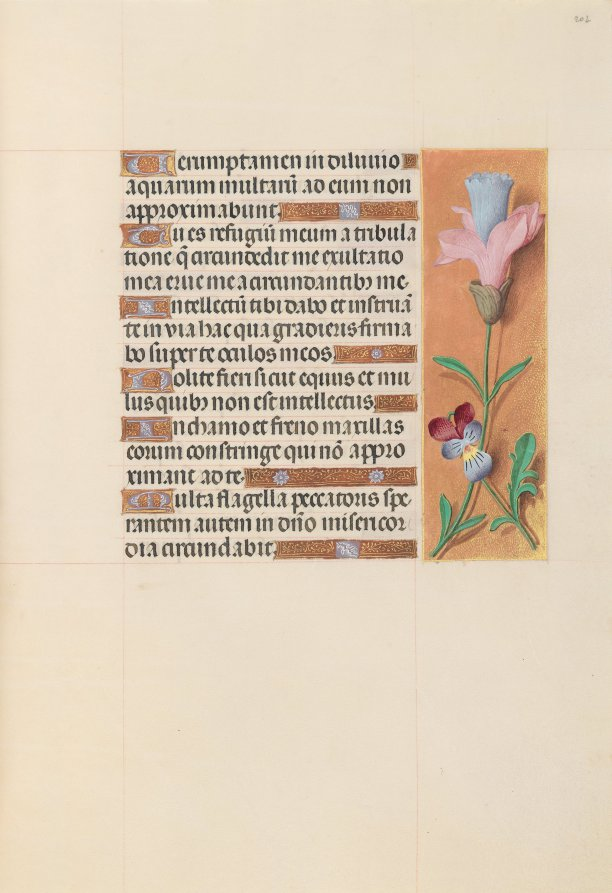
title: Hours of Queen Isabella the Catholic, Queen of Spain: Fol. 202r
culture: Flanders, Ghent and Bruges, late 15th century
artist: Master of the First Prayerbook of Maximillian (Flemish, c. 1444–1519)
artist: and Associates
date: c. 1500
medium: ink, tempera, and gold on vellum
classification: Bound Volume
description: This manuscript was illuminated by a circle of at least five highly organized manuscript painters active in the Flemish cities of Ghent and Bruges. The principal illuminator was Alexander Bening, who painted the majority of the book's miniatures. Manuscripts produced by this circle of artists are renowned for the decoration of their borders, which typically feature a rich variety of realistically-painted flowers, birds, and butterflies. This prayer book, called a book of hours, was intended not for a cleric, but for the private devotions of a lay person-in this case, Isabella the Catholic, Queen of Spain (1451-1504). Isabella's coat of arms embellishes the book's frontispiece. It is unlikely that the book was commissioned by the Queen herself; rather, she probably received it as a diplomatic gift from someone courting her patronage, perhaps Cardinal Francisco Jimenez de Cisneros. A Franciscan friar, Jimenez was dependent upon Isabella for his advancement, first to the post of Queen's confessor in 1492, and then to Archbishop of Toledo in 1495.